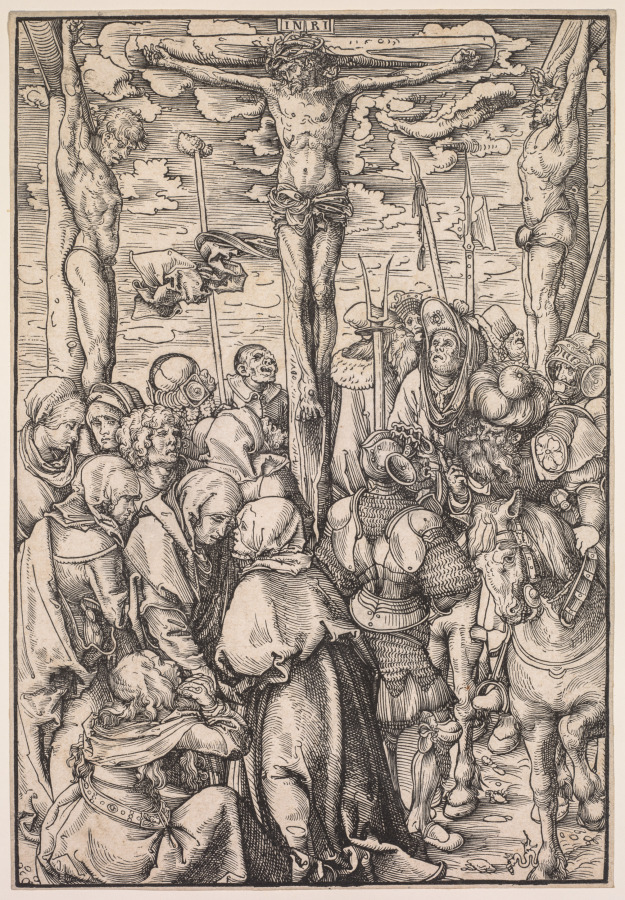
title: The Passion: Crucifixion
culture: Germany, early 16th Century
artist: Lucas Cranach (German, 1472–1553)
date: 1509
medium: woodcut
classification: Print